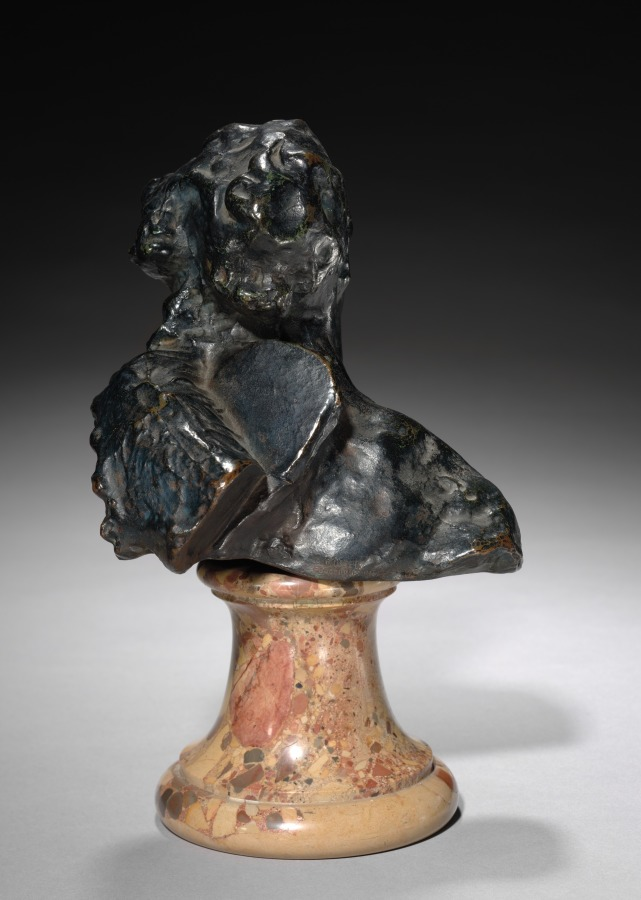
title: Head of the Little Martyr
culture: France, late 19th-early 20th century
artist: Auguste Rodin (French, 1840–1917)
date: c. 1880 – 1885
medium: bronze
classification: Sculpture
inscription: Signed sinister side: "A. Rodin"; inside front in relief: "A. Rodin"